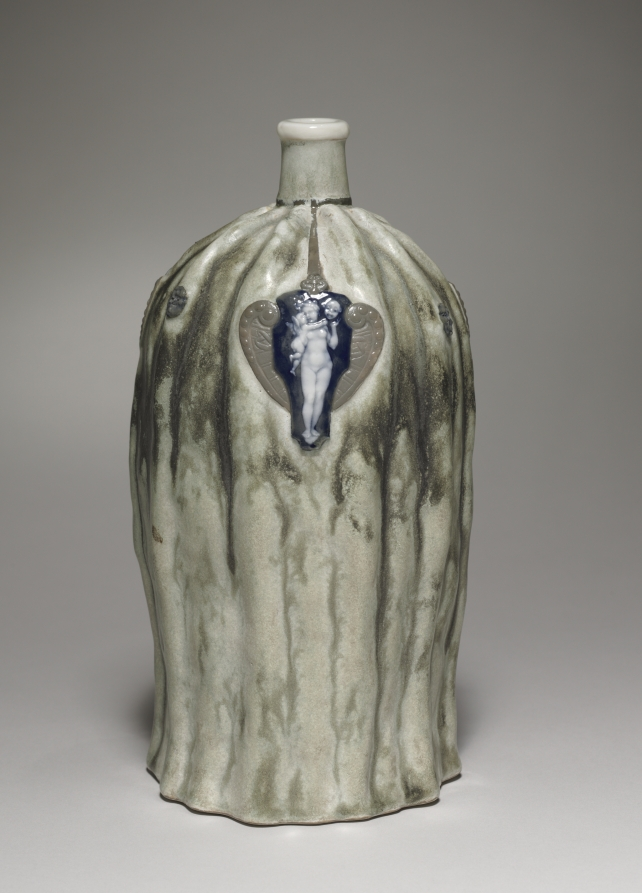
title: Vase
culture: France, Sèvres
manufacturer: Sèvres Porcelain Factory (French, est. 1756)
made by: Taxile Maximin Doat (French, 1851–1939)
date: c. 1900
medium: porcelain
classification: Ceramic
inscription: inscribed on base in light brown glaze: DOAT/T/Sevres.